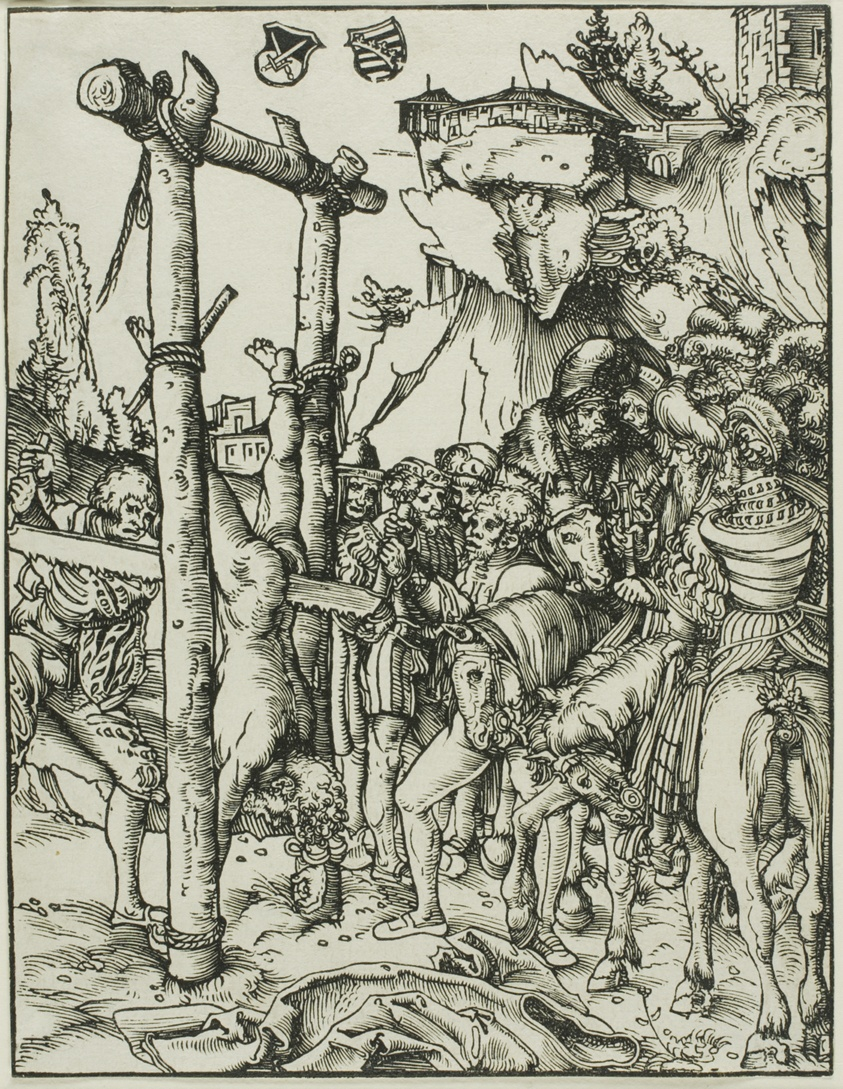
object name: Print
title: Saint Simon, from The Martyrdom of the Apostles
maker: Lucas Cranach the Elder (German, 1472-1553)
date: c. 1512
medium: Woodcut in black on ivory laid paper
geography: Germany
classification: woodcut; print; prints and drawing